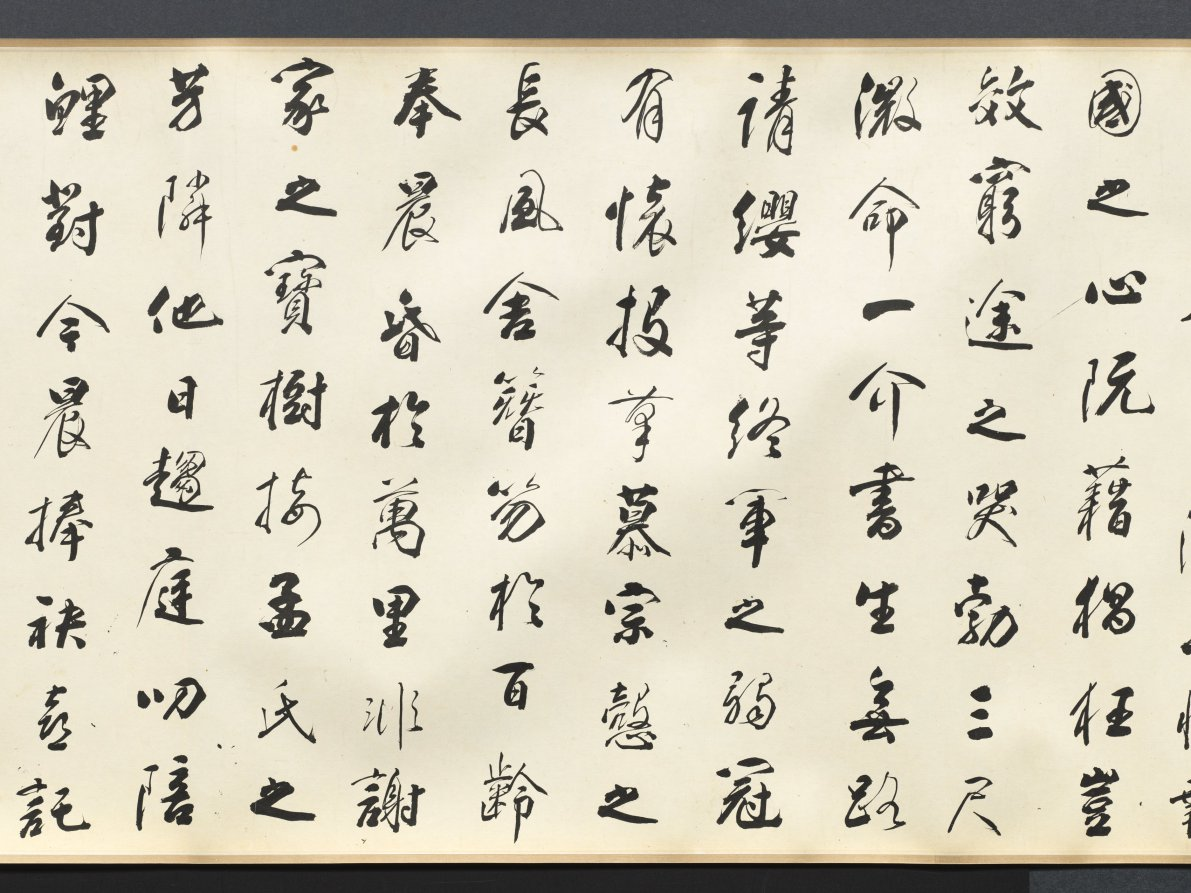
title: Calligraphy in Running Style based on Wang Bo's Essay on Tengwang Pavilion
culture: China, Changbai, Qing dynasty (1644-1911)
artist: Tiebao (Chinese, 1752–1824)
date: 1811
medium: handscroll, ink on paper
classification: Calligraphy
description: A member of the Donggo clan, Tiebao belonged to the Manchu Plain Yellow Banner army. As an official in the Qing court, he endured considerable vicissitude and his career was never smooth. Celebrated as a man of letters, he oversaw the publications of the Manchu military system as well as an anthology of poems by members of the imperial family and other Manchu dignitaries. In calligraphy, he was regarded as the equal of such eighteenth-century luminaries as Liu Yong (1720-1805) and Weng Fanggang (1733-1818). This handscroll is a work of his mature years and is exemplary of his disciplined and highly subtle approach to the art of calligraphy.